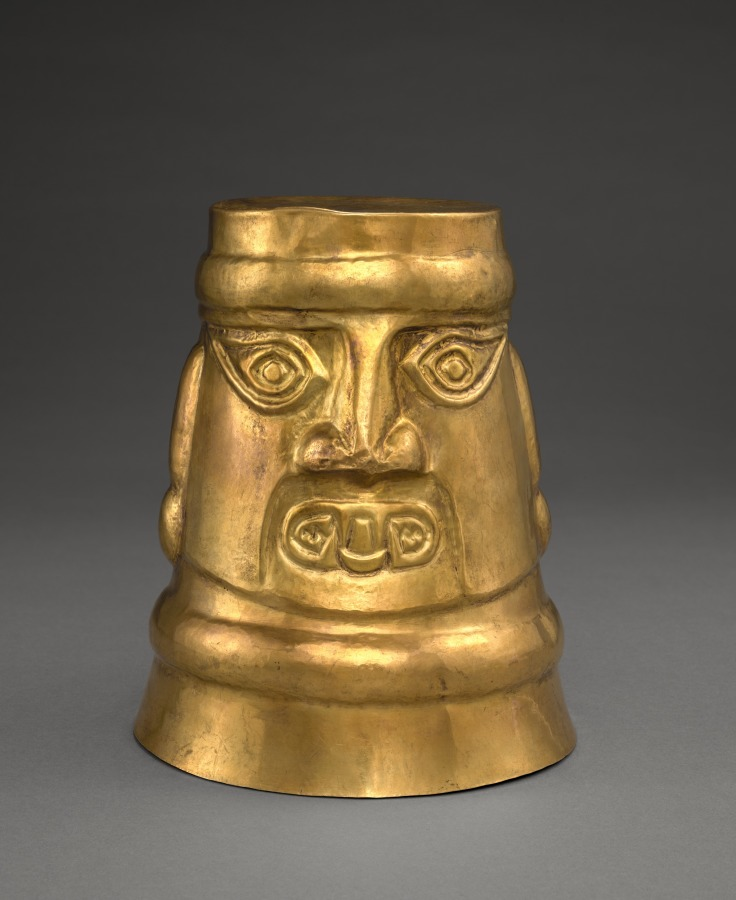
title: Head Beaker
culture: Central Andes (Peru), Lambayeque (Sicán) people, 10th century-12th century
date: 900–1100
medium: gold, hammered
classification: Metalwork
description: Metalworking flourished among the Lambayeque people of Peru’s north coast. Artists made large objects, including containers, in unprecedented numbers; one Lambayeque tomb contained nearly 200 gold or silver beakers. The head on this beaker has been interpreted as the visage of either the culture’s principal deity—its divinity signaled by its feline-like fangs—or the deified founder of the Lambayeque ruling dynasty. It is not known why the head is upright only when the beaker rests on its rim.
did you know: This drinking vessel holds close to 62 oz of fluid—almost half a gallon!